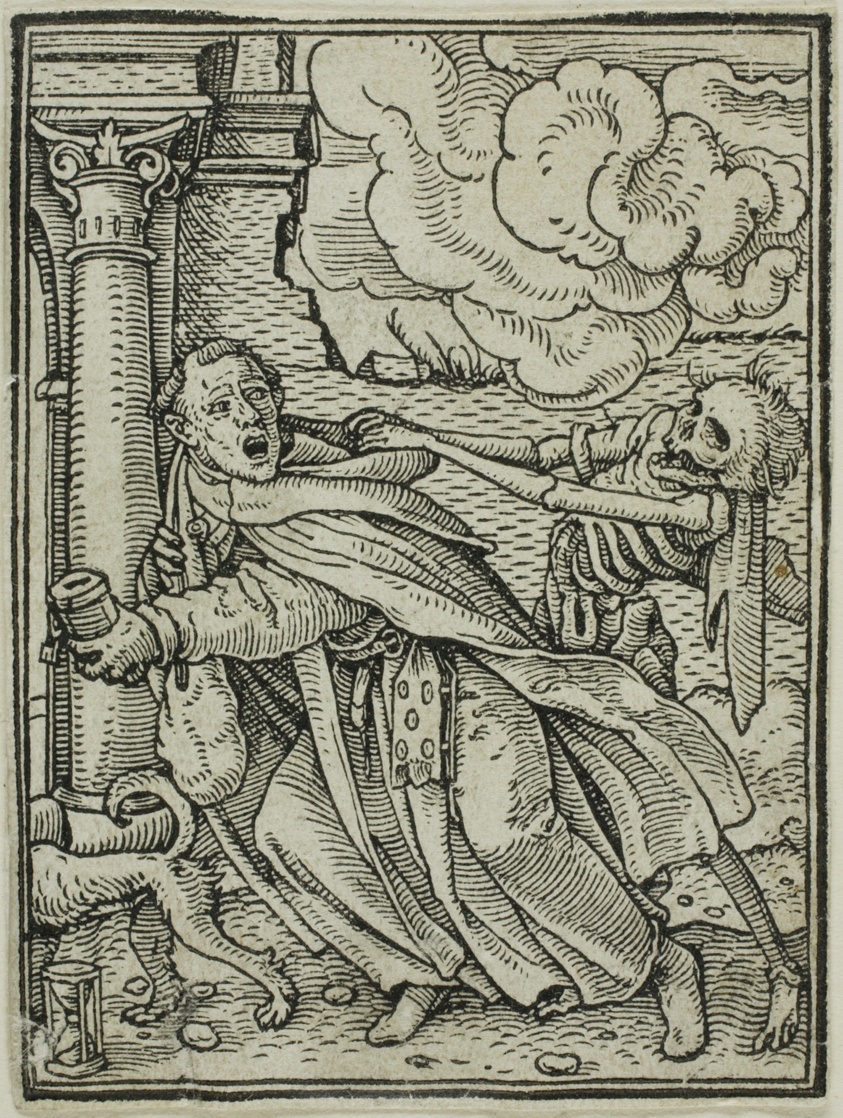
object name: Print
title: The Monk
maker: Hans Holbein, the younger (German, 1497-1543)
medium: Woodcut on paper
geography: Germany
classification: woodcut; print; prints and drawing